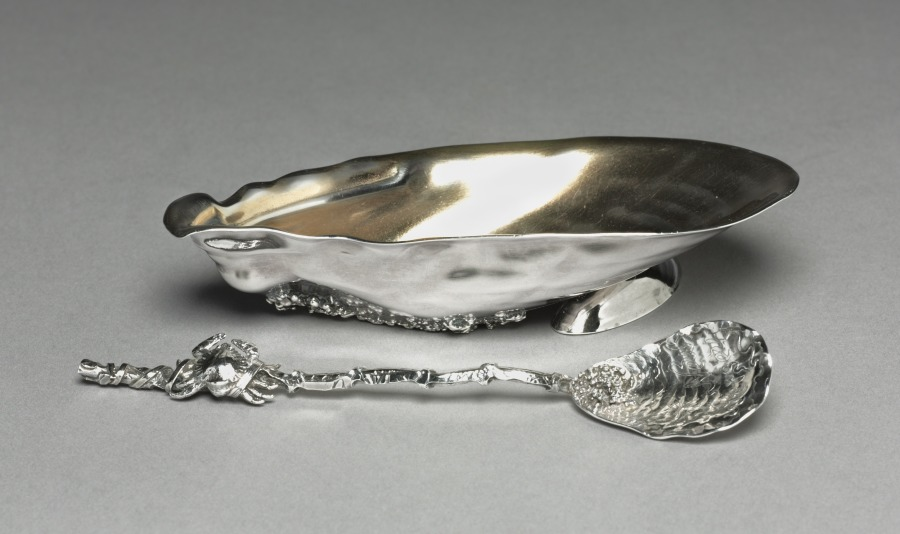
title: Narragansett Salt Cellar and Spoon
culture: America, Rhode Island, Providence, 19th century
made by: Gorham Manufacturing Company (America, est. 1831)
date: 1884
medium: handwrought sterling silver, partially gilt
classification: Silver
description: This small salt dish and spoon reflect the late 19th-century interest in incorporating naturalistic details into the design of useful pieces-in this instance probably inspired by Japanese examples.